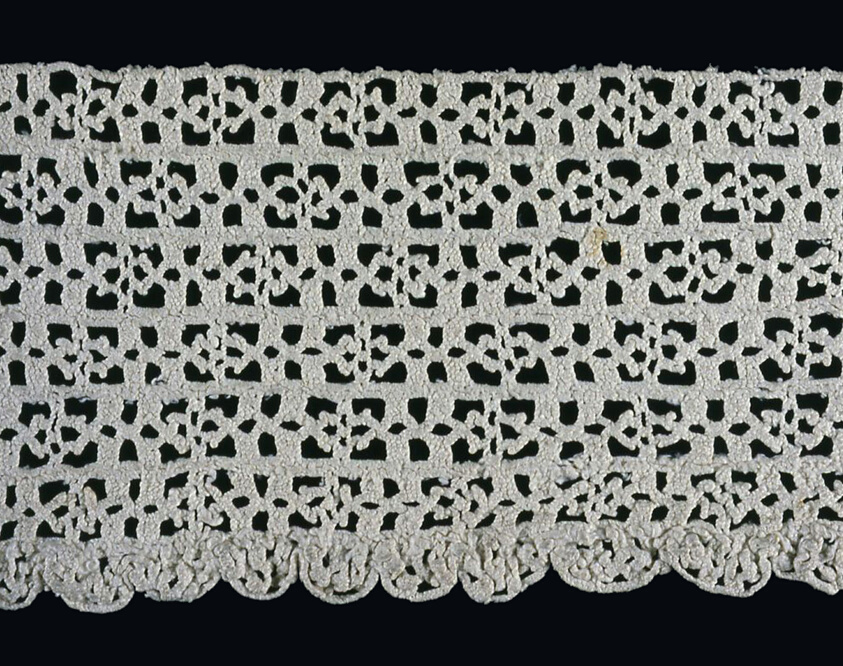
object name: Textile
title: Panel (Made from Six Joined Insertions)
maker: Probably Italy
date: 1551/1625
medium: Linen, bobbin straight lace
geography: Italy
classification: textile; lace - bobbin